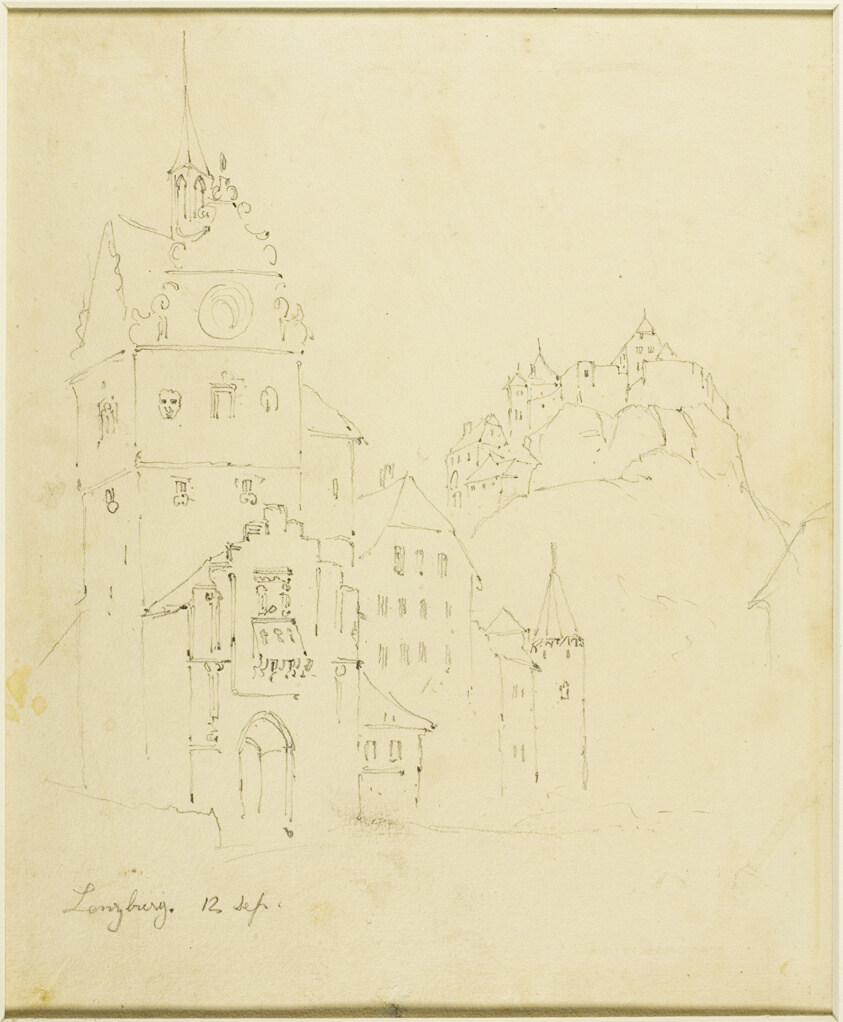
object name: Drawing and Watercolor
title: Fortresses in Tyrol, near Mals (recto); Castle in Lenzburg (verso)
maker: John Ruskin (English, 1819-1900)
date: 1839/1900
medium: Graphite (recto and verso) on buff wove paper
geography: England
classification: drawings (visual works); prints and drawing